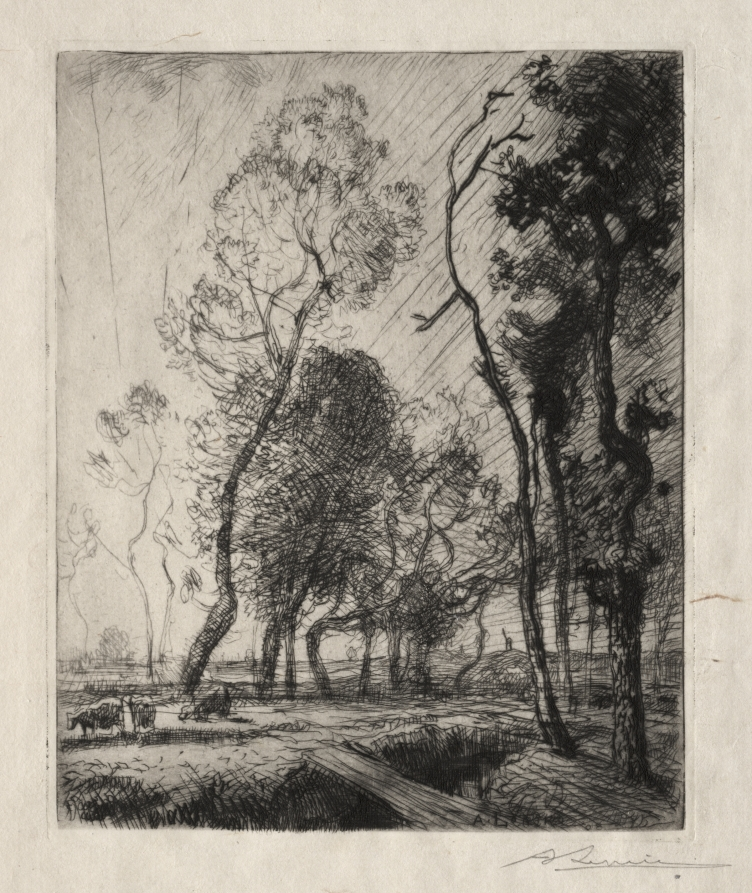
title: Coucher de Soleil derrière les Arbres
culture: France, 20th century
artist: Auguste Louis Lepère (French, 1849–1918)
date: 1909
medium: etching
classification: Print